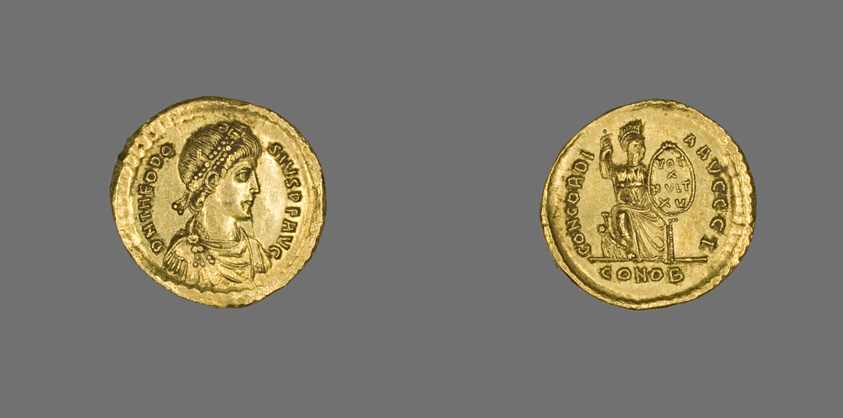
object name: Coin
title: Solidus (Coin) of Emperor Theodosius I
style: byzantine, ancient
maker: Byzantine; minted in Constantinople (now Istanbul)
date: 383 (25 August)-388 (28 August)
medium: Gold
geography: Istanbul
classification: coin; ancient art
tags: portraits